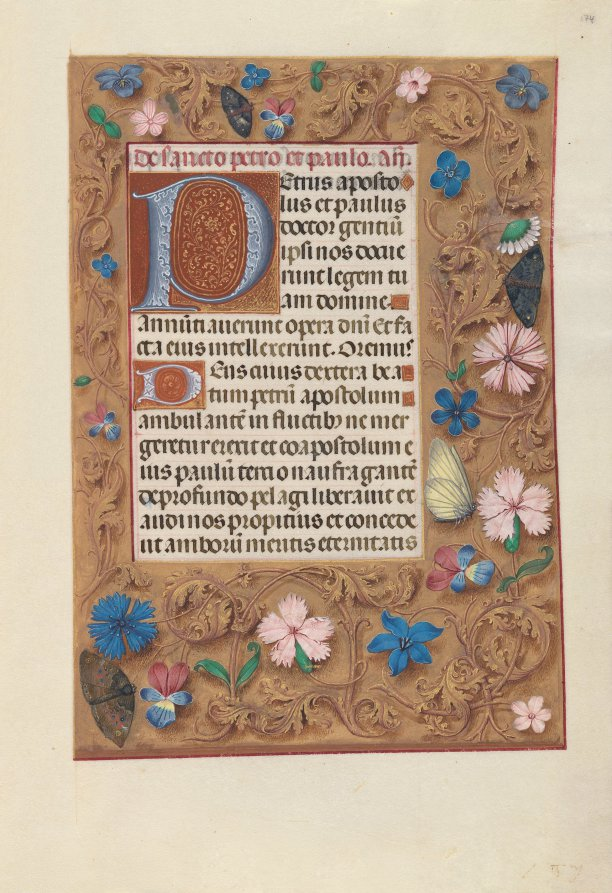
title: Hours of Queen Isabella the Catholic, Queen of Spain: Fol. 174r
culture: Flanders, Ghent and Bruges, late 15th century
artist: Master of the First Prayerbook of Maximillian (Flemish, c. 1444–1519)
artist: and Associates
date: c. 1500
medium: ink, tempera, and gold on vellum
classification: Bound Volume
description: This manuscript was illuminated by a circle of at least five highly organized manuscript painters active in the Flemish cities of Ghent and Bruges. The principal illuminator was Alexander Bening, who painted the majority of the book's miniatures. Manuscripts produced by this circle of artists are renowned for the decoration of their borders, which typically feature a rich variety of realistically-painted flowers, birds, and butterflies. This prayer book, called a book of hours, was intended not for a cleric, but for the private devotions of a lay person-in this case, Isabella the Catholic, Queen of Spain (1451-1504). Isabella's coat of arms embellishes the book's frontispiece. It is unlikely that the book was commissioned by the Queen herself; rather, she probably received it as a diplomatic gift from someone courting her patronage, perhaps Cardinal Francisco Jimenez de Cisneros. A Franciscan friar, Jimenez was dependent upon Isabella for his advancement, first to the post of Queen's confessor in 1492, and then to Archbishop of Toledo in 1495.